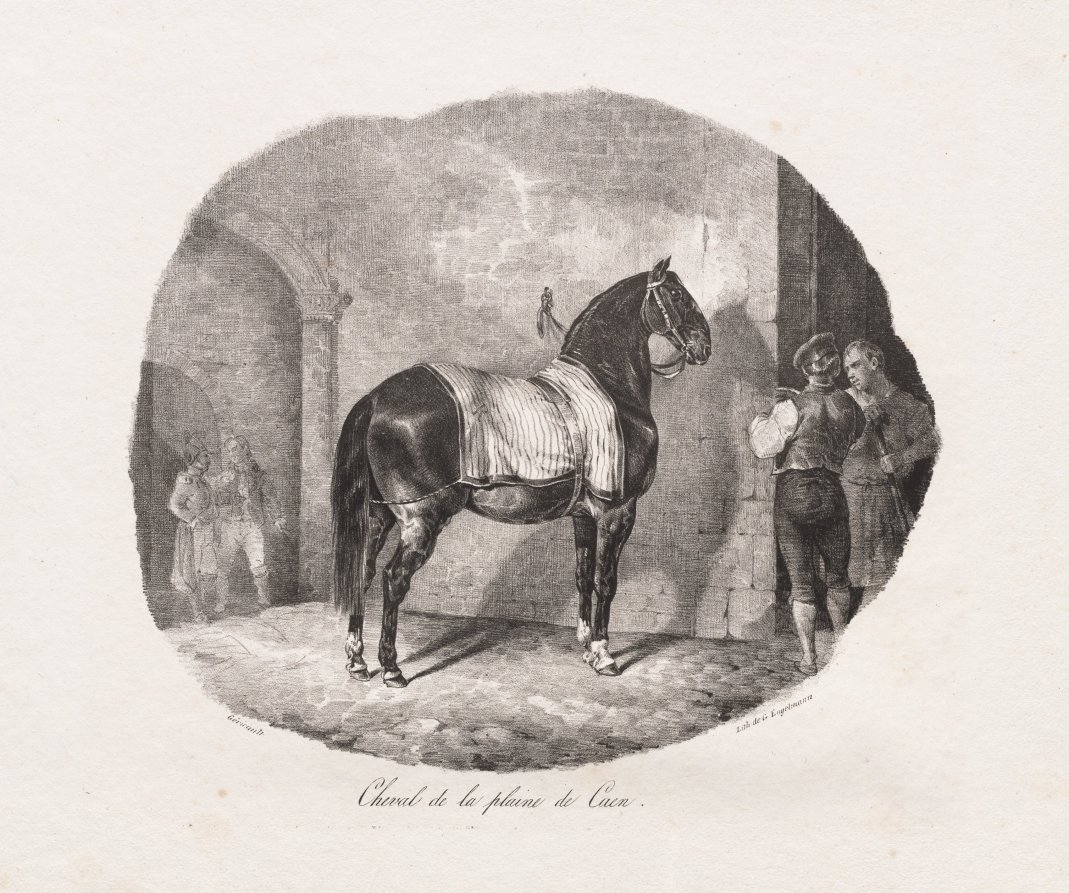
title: Lithographed Studies of Horses: Pl. 7, Horse from the Caen Plain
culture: France, 19th century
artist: Théodore Géricault (French, 1791–1824)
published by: Gihaut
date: 1822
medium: lithograph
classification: Print